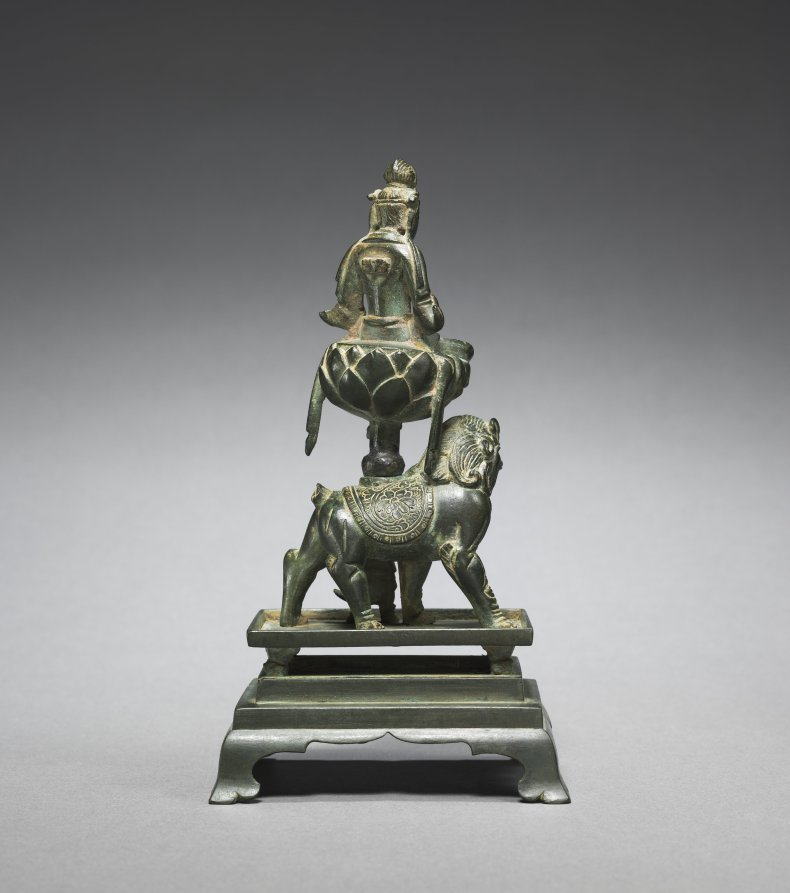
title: Manjusri Riding on a Lion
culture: China, Liao dynasty (916-1125)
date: 900s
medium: bronze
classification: Sculpture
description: The Bodhisattva of Wisdom, Manjusri, is seated on a lotus pedestal atop his vehicle, the lion. A bearded attendant stands beside the lion.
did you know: At one time, something was threaded through the harness of the lion and the hands of the attendant.